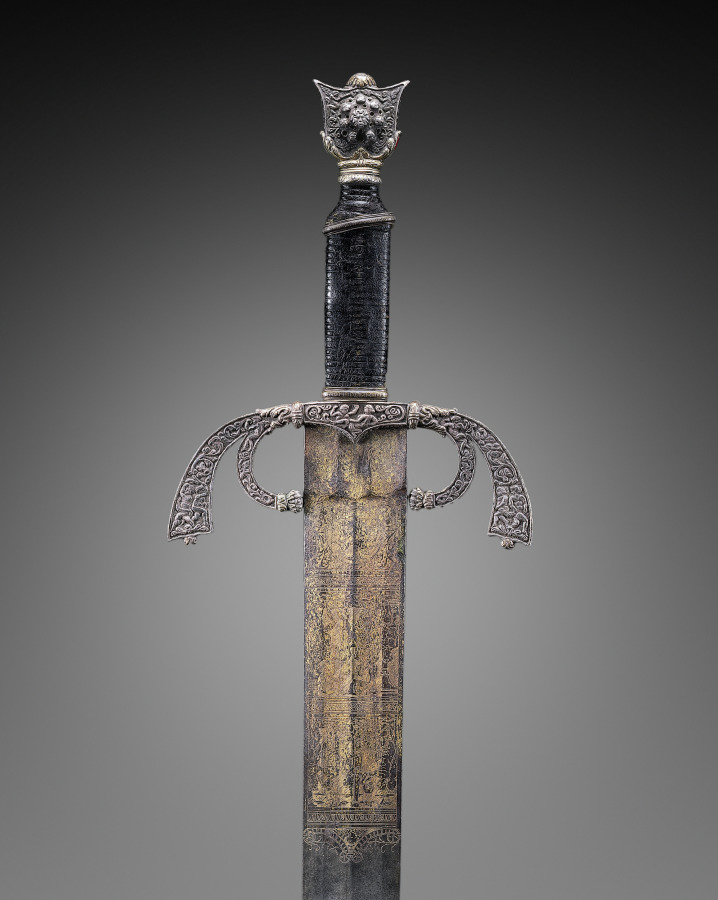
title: Parade Sword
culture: Italy, Ferrara, early 16th Century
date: c. 1500–1525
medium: steel, etched and gilded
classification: Arms and Armor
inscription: Ercole dei Fideli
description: This parade sword has a steel blade with etched and gilded bands of decoration. The decoration includes allegorical figures such as dancing satyrs and nymphs, amorini or cupids, and triumphs. The pommel, the rounded knob on the end of the handle, is flat and shaped like a shield; a raised rosette further embellishes it. The quillons or two transverse projecting members forming the cross guard, are flattened and drooping toward the blade.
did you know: Ercole dei Fedeli was an Italian goldsmith and master sword engraver; his name appears on this blade.